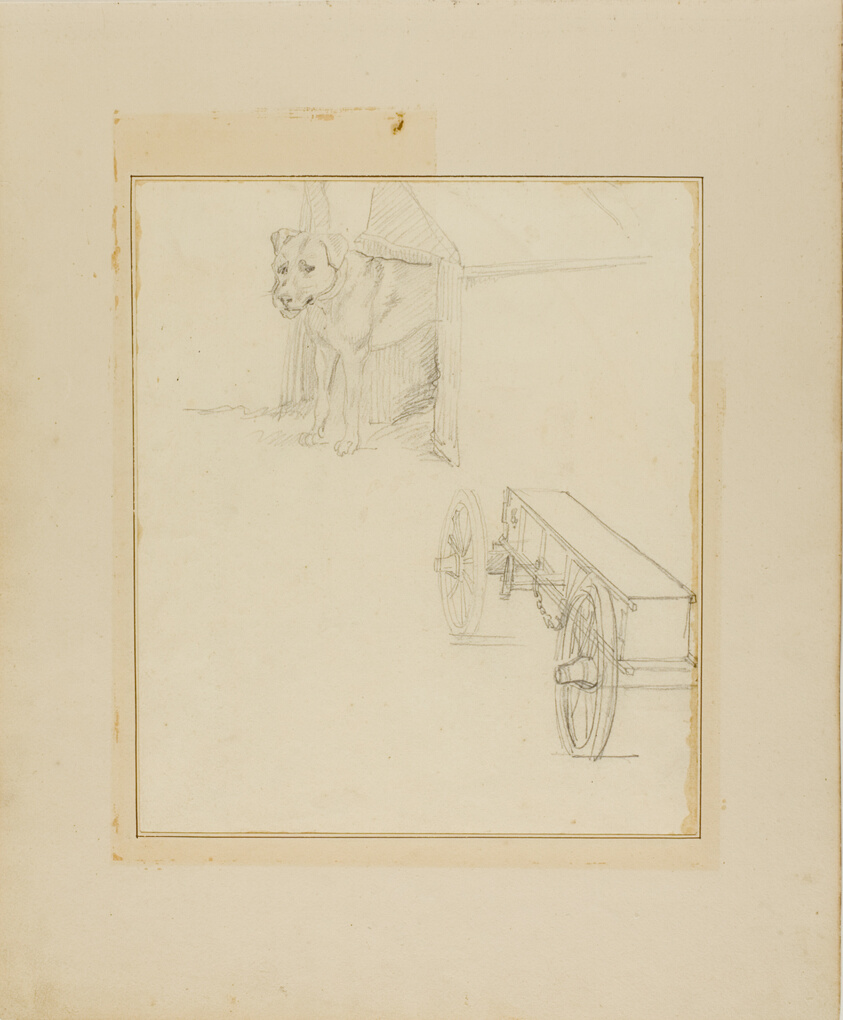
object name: Drawing and Watercolor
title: Dog Standing in Dog House and Study of a Munitions Cart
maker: Jean Louis André Théodore Géricault (French, 1791-1824)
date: 1818/19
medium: Graphite, on cream wove paper, perimeter mounted on cream wove paper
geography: France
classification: graphite; drawings (visual works); prints and drawing